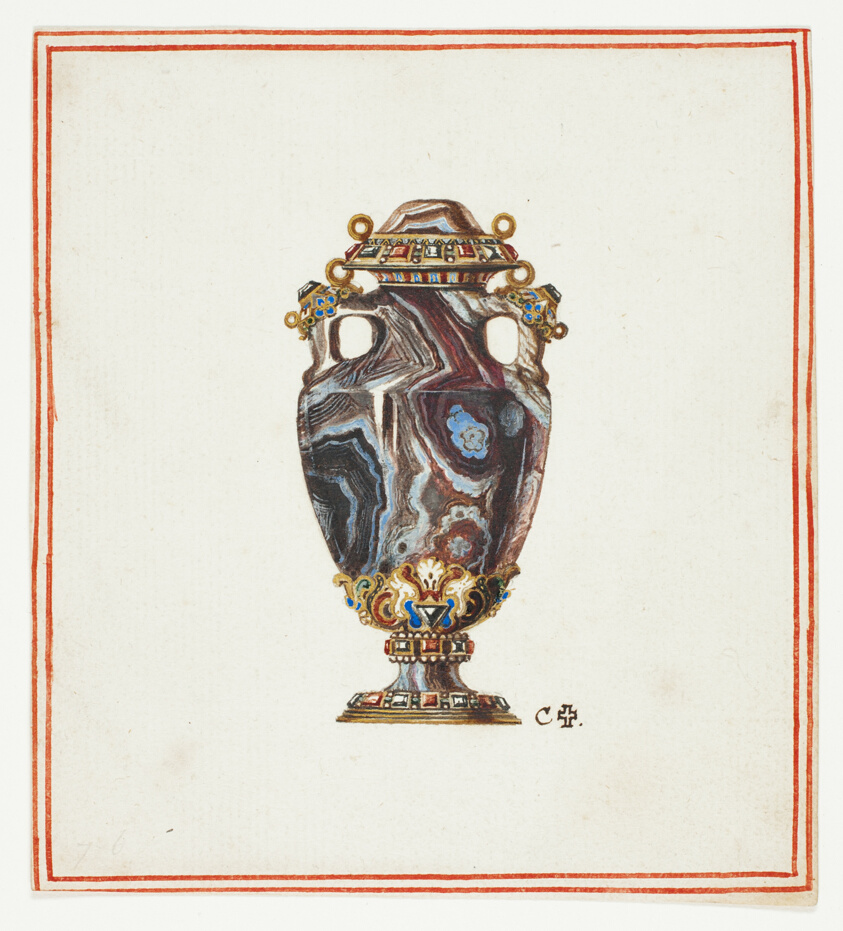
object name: Drawing and Watercolor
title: Porphyry Vase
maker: Giuseppe Grisoni (Italian, born Flanders, 1699-1769)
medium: Gouache with gold paint, on ivory laid paper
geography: Flanders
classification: gouache; drawings (visual works); prints and drawing